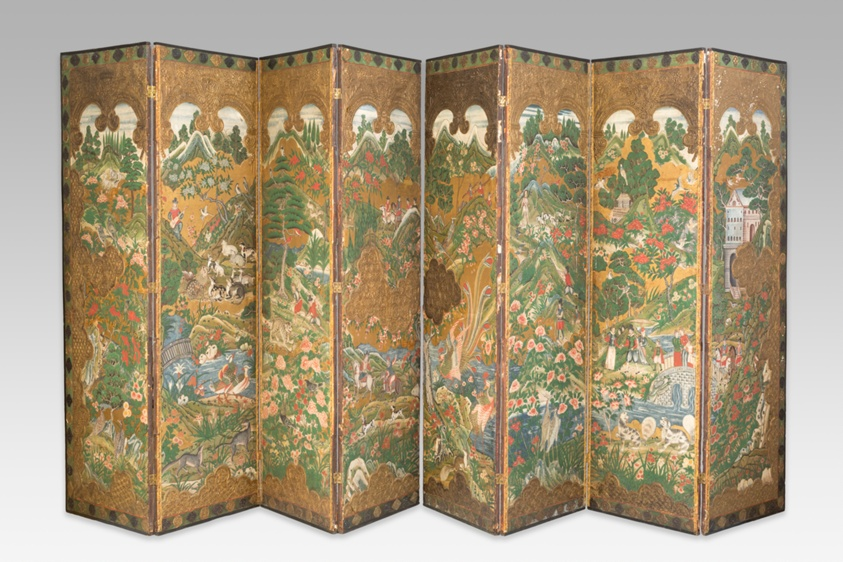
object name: Furniture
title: Folding Screen (Biombo)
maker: Sino-Portuguese, Probably Macau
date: 17th century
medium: Wood, canvas, paper, polychrome colors, and gilding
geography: China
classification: screen; furniture; european decorative arts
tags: furniture